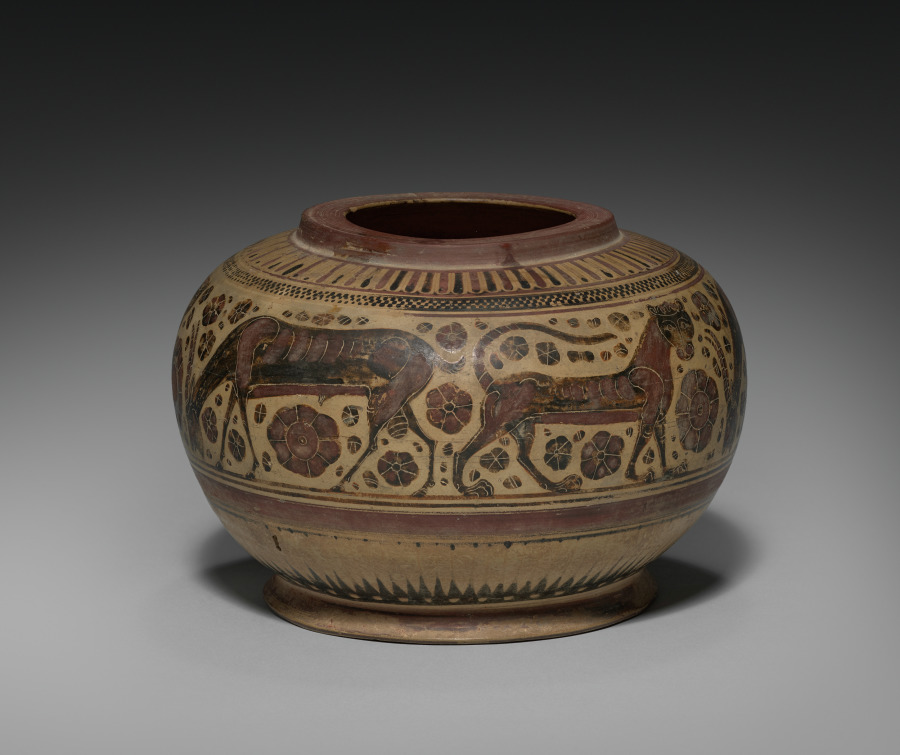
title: Corinthian Vase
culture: Greece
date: 600s BCE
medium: earthenware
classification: Ceramic